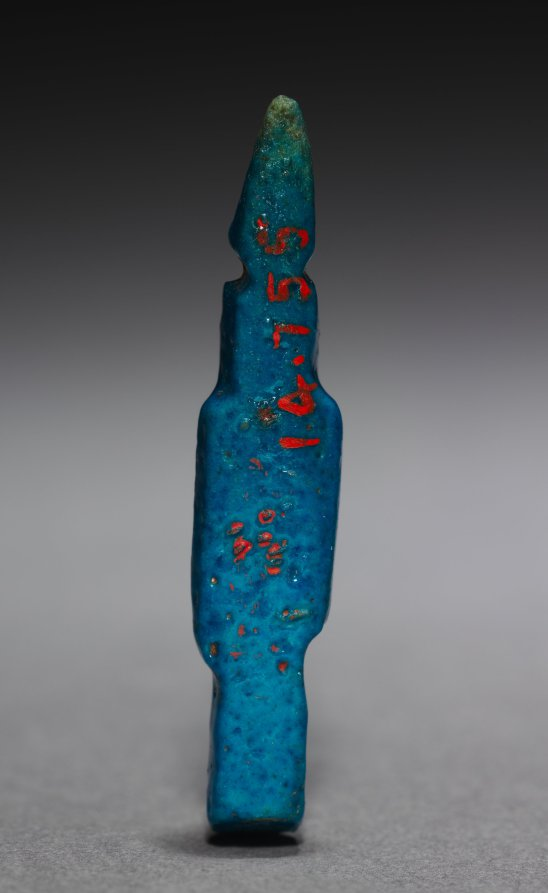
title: Amulet of Mut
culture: Egypt, Third Intermediate (1069–715 BCE)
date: 1069–715 BCE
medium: turquoise faience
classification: Amulets